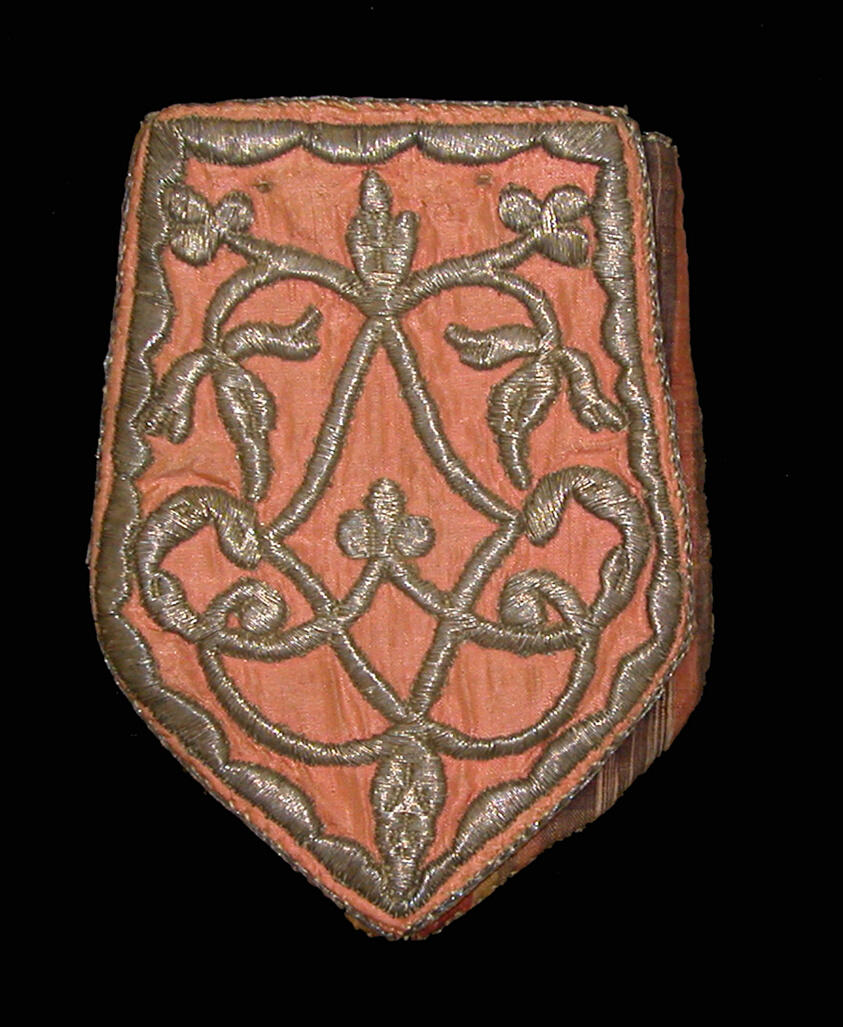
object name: Costume and Accessories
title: Bag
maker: France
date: 1680/1700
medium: Silk, plain weave; embroidered with gilt-metal-strip-wrapped silk laid over padding and gilt-metal-strip-wrapped silk in chain stitch; gussets: silk, plain weave; lining: silk, plain weave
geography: France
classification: textile; bag - needlework; costume accessory - bag; costume accessory; costume